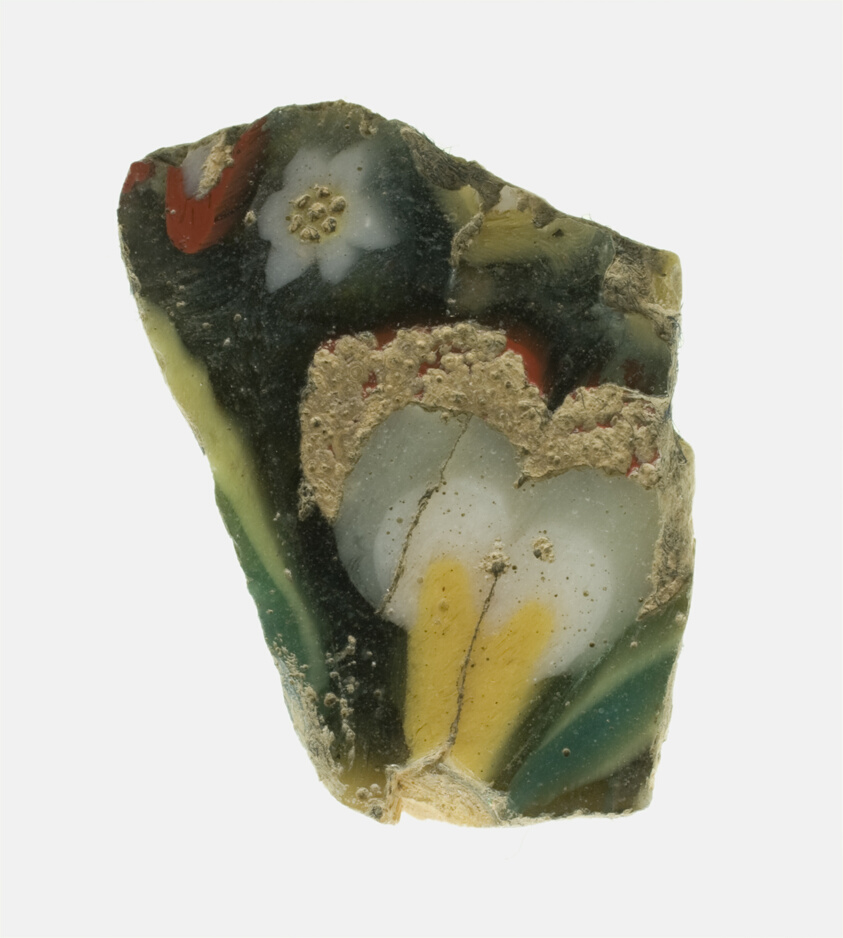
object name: Decorative Arts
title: Fragment of a Floral Inlay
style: ptolemaic, greco-roman (egyptian)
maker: Egyptian or Roman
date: Ptolemaic Period–Roman Period, (1st century BCE–1st century CE)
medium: Glass, mosaic technique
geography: Egypt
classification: fragment; decorative arts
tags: floral